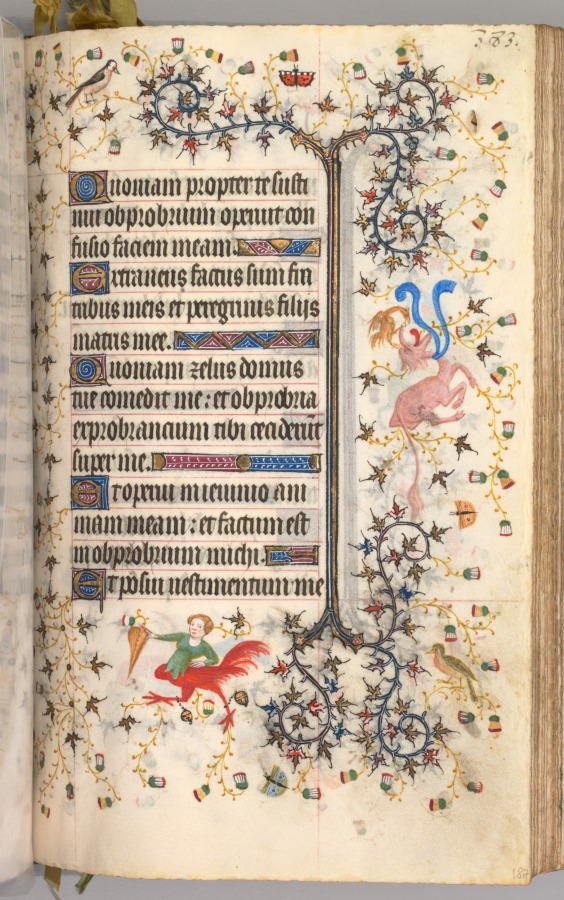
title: Hours of Charles the Noble, King of Navarre (1361-1425): fol. 187r, Text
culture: France, Paris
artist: Master of the Brussels Initials and Associates (French)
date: c. 1405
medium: ink, tempera, and gold on vellum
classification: Bound Volume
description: This precious volume was obviously highly prized by its owner, the French-born King of Navarre, who had his coat of arms painted on no less than twenty folios. Rather than directly commissioning this manuscript from a specific workshop, it seems that Charles the Noble acquired his book of hours -- perhaps ready-made for the luxury market -- while on a trip to Paris in 1404-05. A collaborative effort, six painting styles are evidenced within the pages of this codex, those of two Italians, two Frenchmen, and two Netherlanders. The painter who was responsible for the planning and decoration of the book, and who produced seventeen of the large miniatures, was a Bolognese artist known as the Master of the Brussels Initials. His principal assistant, responsible for most of the borders, was a Florentine who signed his name "Zecho" da Firenze on folio 208 verso.